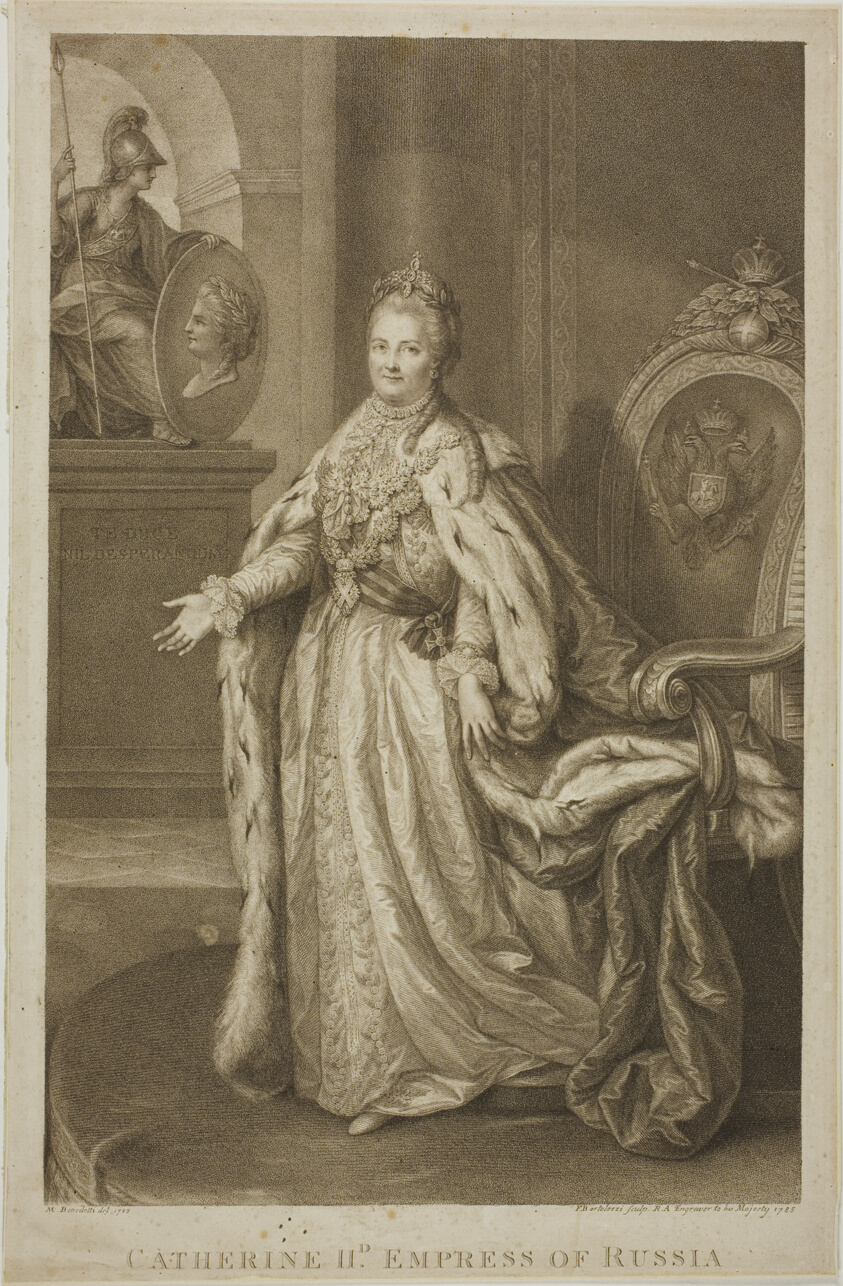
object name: Print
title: Catherine II, Empress of Russia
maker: Francesco Bartolozzi (Italian, 1727-1815); probably after Michele Benedetti (Italian, 1745-1810)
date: 1785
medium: Stipple engraving and engraving on ivory chine, laid down on paper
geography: Italy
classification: engraving; print; prints and drawing